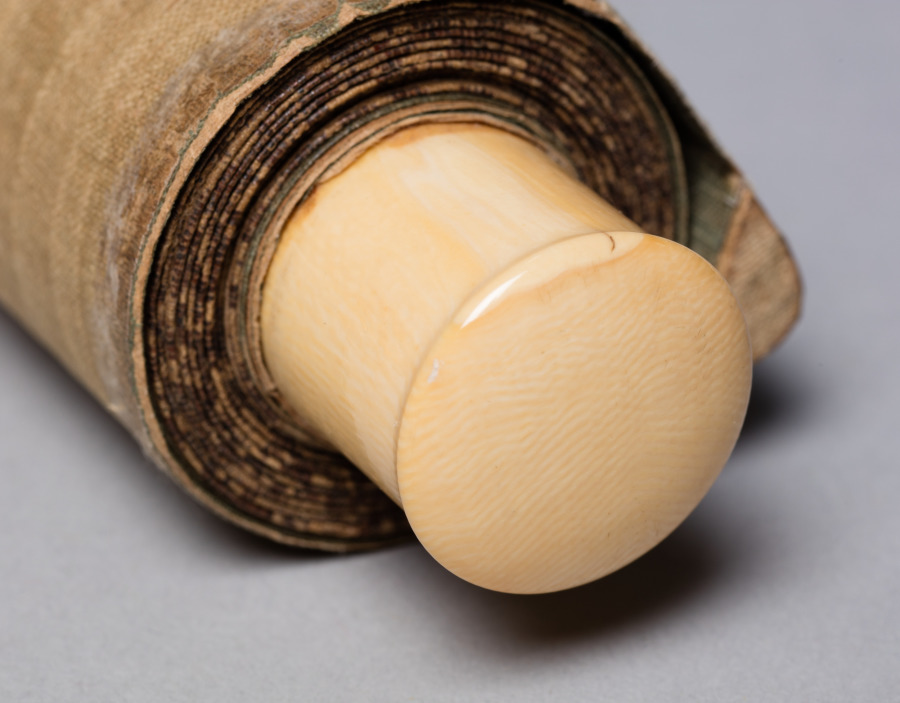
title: Reeds and Geese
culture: Japan, Kamakura period (1185–1333)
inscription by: Yishan Yining [Issan Ichinei] (Chinese, 1247–1317)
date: 1314–17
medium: hanging scroll; ink on paper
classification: Painting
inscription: signed: Issan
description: Reeds and geese has been a common pairing in Chinese literary and visual culture for many centuries. This painting presents the contribution of a Japanese amateur painter, almost certainly a Zen Buddhist monk, to Japan’s fledgling efforts to add the theme to its own cultural vocabulary in the early 1300s. As was customary at the time in Japan, the painter did not sign or seal his work; the inscription, a poem added to the painting by the eminent émigré monk Yishan Yining, along with his signature and seal, was of far greater cultural value. Today, the modestly sized painting has tremendous significance as one of the earliest surviving examples of Japanese ink paintings with reeds and geese.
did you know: Tokyo National Museum owns a copy of this painting made by Kano Gyokusen (1796–1864) when he was 14 years old.